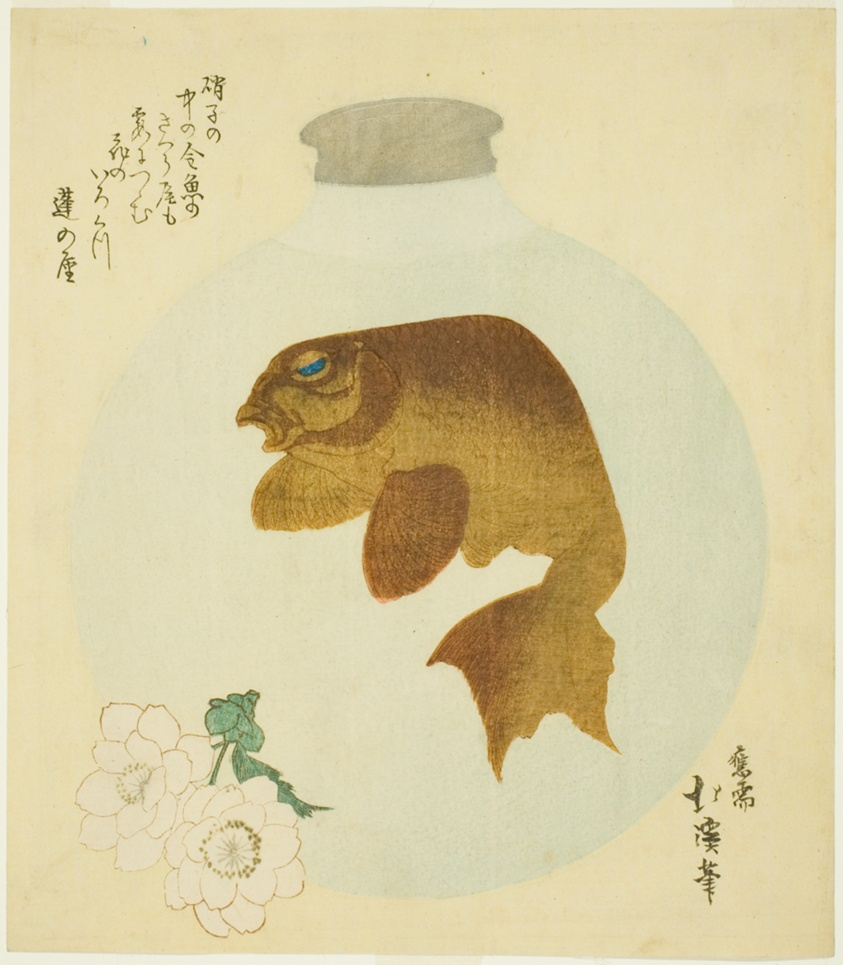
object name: Print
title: Bottle with a goldfish design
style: Japanese (culture or style)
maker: Totoya Hokkei (Japanese, 1780–1850)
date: c. late 1820s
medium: Color woodblock print; shikishiban, surimono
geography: Japan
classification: woodblock print; print; asian art